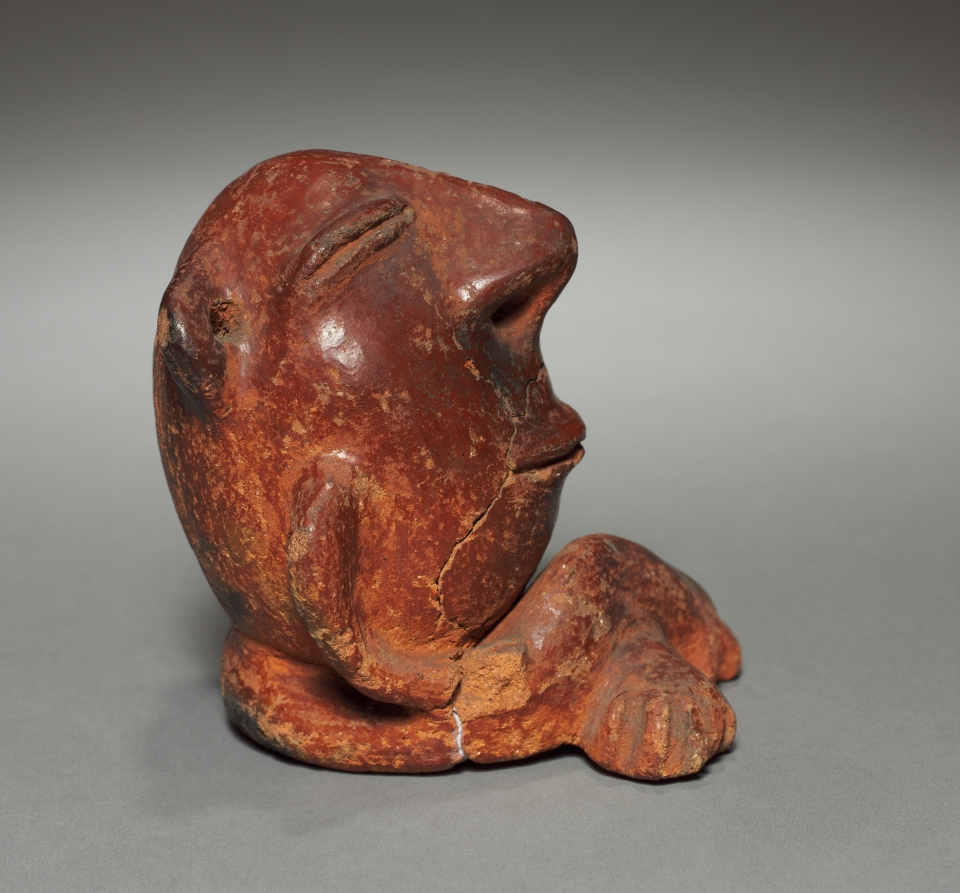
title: Grotesque Figure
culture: Colombia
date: before 1921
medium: red ware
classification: Ceramic